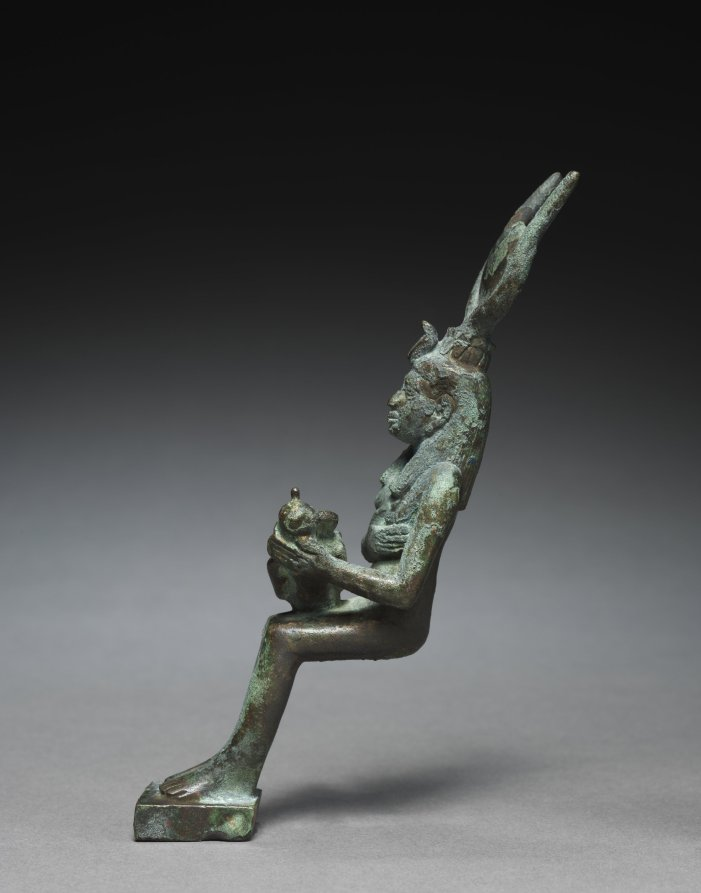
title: Statuette of Isis and Horus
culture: Egypt, Greco-Roman period (332 BCE–395 CE), Ptolemaic dynasty (305–30 BCE)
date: 305–30 BCE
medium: bronze, solid cast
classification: Sculpture